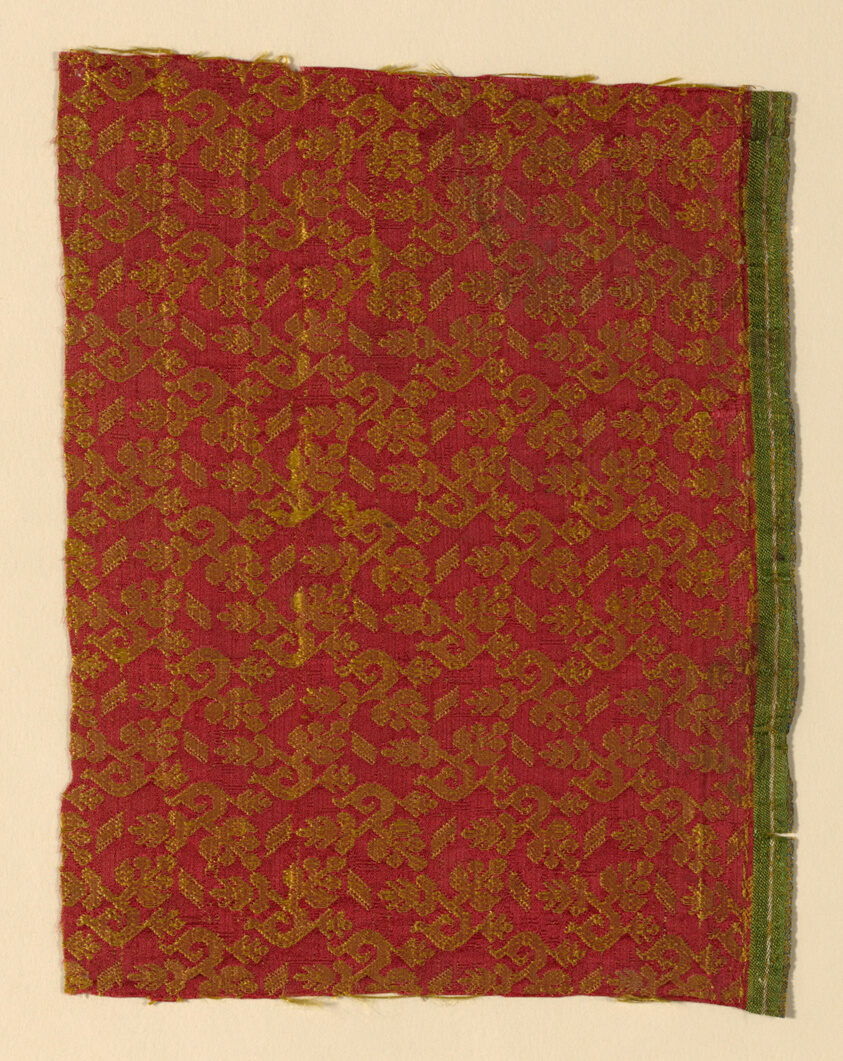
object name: Textile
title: Fragment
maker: Italy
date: First half 17th century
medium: Simple satin damask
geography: Italy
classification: textile; weaving